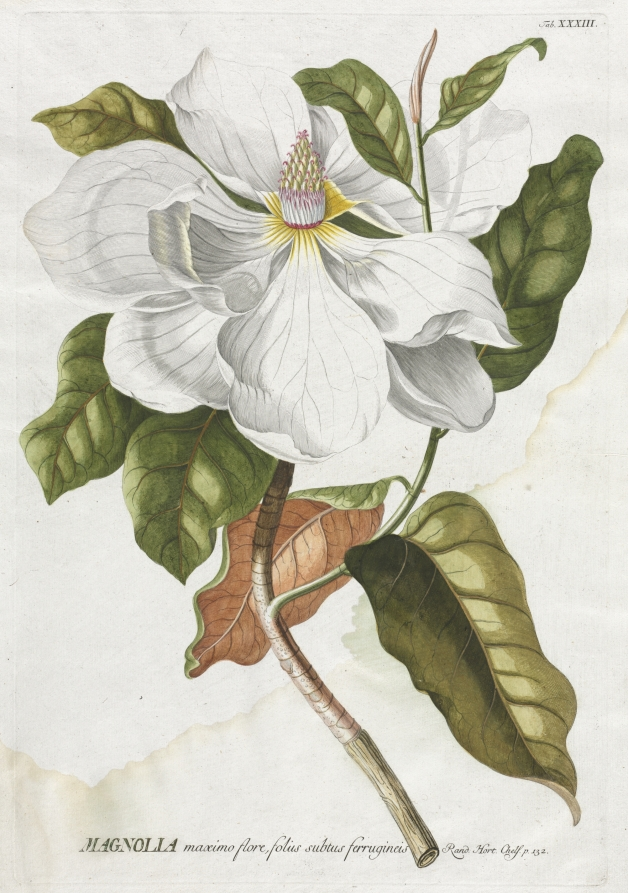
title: Plantae Selectae: No. 33 - Magnolia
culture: Germany, 18th century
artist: Georg Dionysius Ehret (German, 1708–1770)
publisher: Christopher Jacob Trew (German, 1695–1769)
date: published 1750–73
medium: engraving, hand-colored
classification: Print